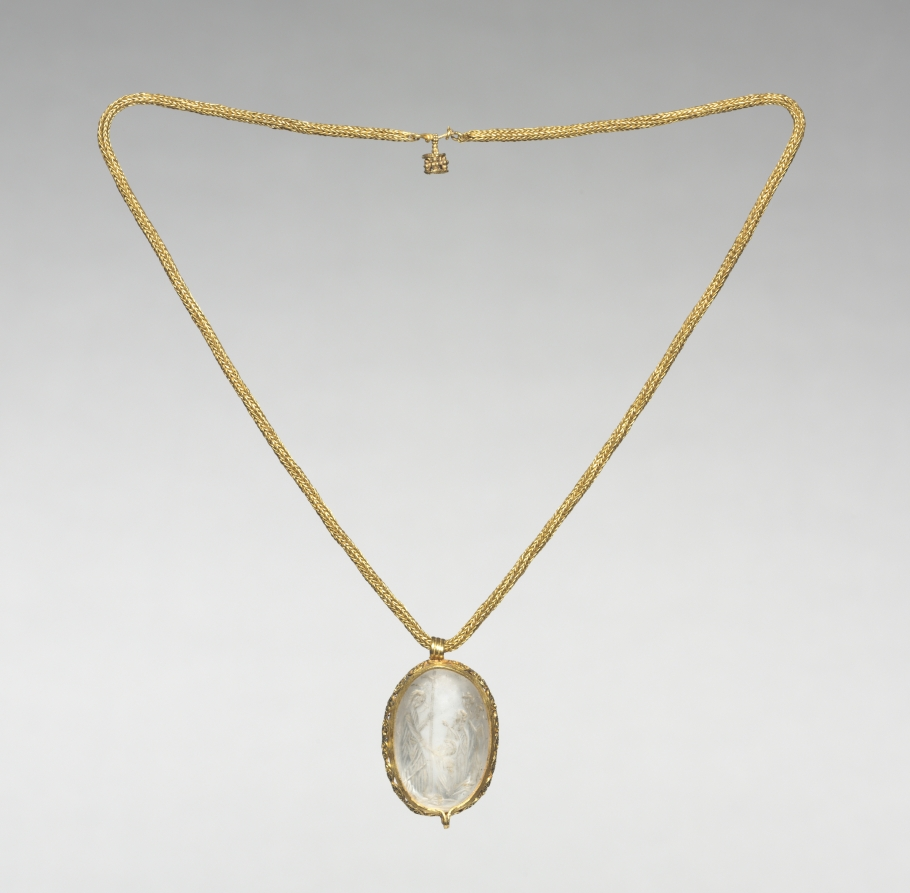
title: Pendant with Reverse Intaglio of the Anastasis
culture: Byzantium, late 6th century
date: late 500s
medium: rock crystal, with gold mount and chain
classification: Jewelry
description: This pendant consists of two dome-shaped pieces of rock crystal, one of which has the design cut into its reverse. The subject is the Anastasis, which shows Christ entering the gates of Hell and releasing Old Testament figures said to have believed in his divinity before his birth. On the left, Christ (with a cross staff) reaches out to Adam, who kneels before him. Eve stands behind, also reaching out her hand. The chain may be of later date.